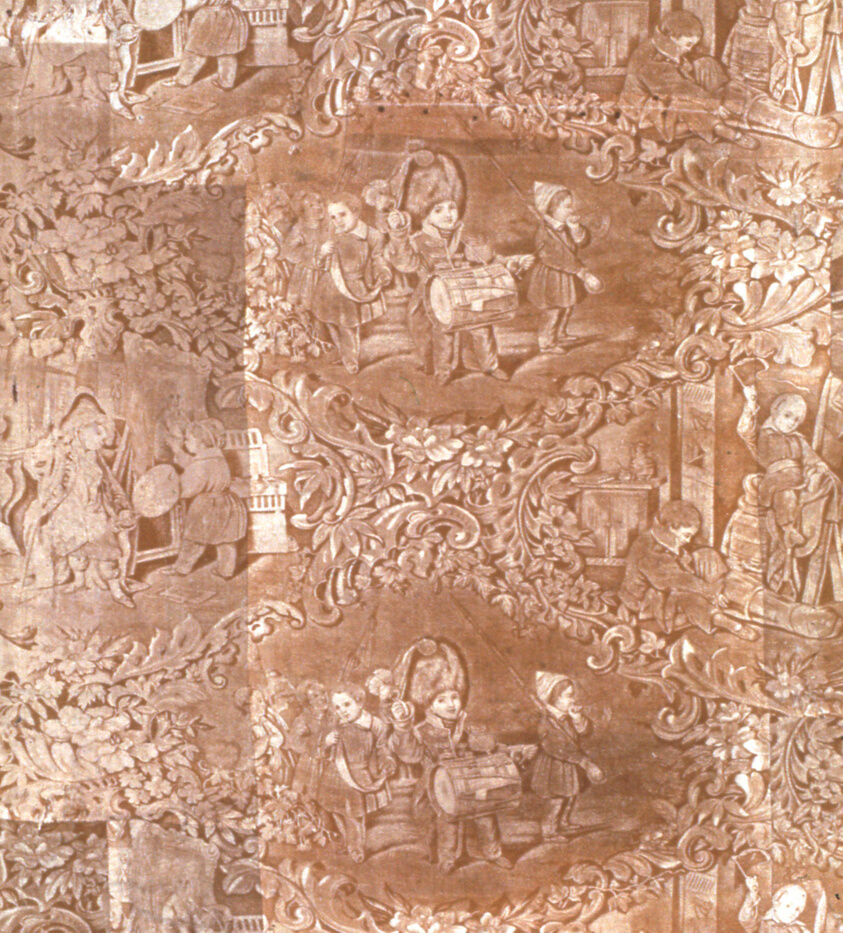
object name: Textile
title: Panel (Furnishing Fabric)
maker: France, Alsace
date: c. 1840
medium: Cotton, plain weave; printed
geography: France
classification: textile; weaving - printed; furnishing textile